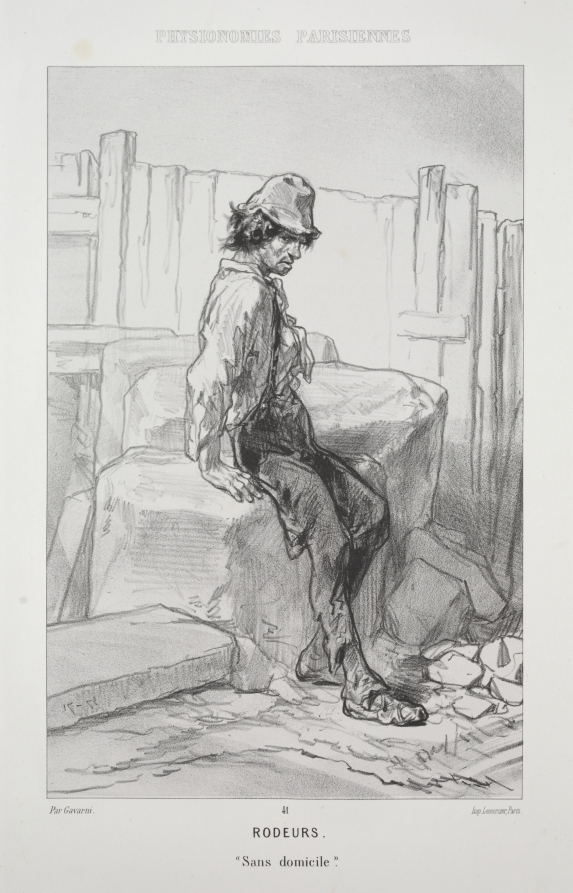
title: Rodeurs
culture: France, 19th century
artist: Paul Gavarni (French, 1804–1866)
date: c. 1858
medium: lithograph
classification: Print